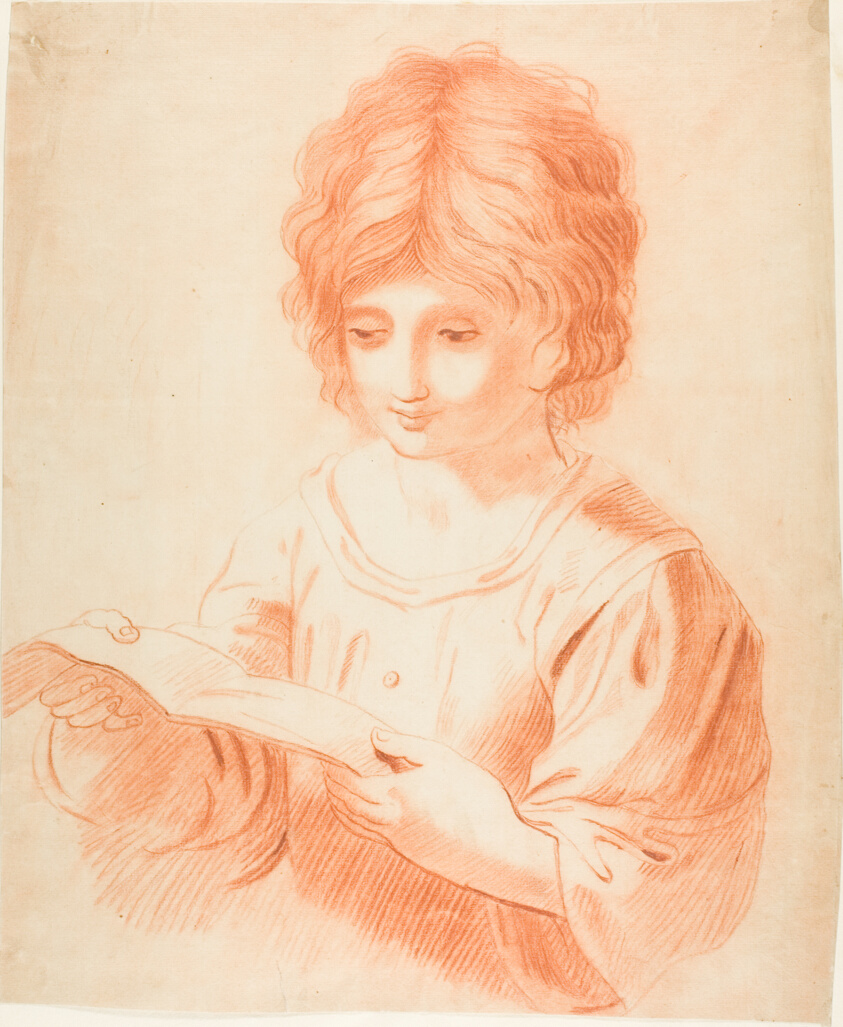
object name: Drawing and Watercolor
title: Boy Reading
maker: After Guercino; Italian, 1591-1666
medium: Red chalk, with stumping, over traces of black chalk, on ivory laid paper, tipped onto cream laid paper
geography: Italy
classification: drawings (visual works); prints and drawing